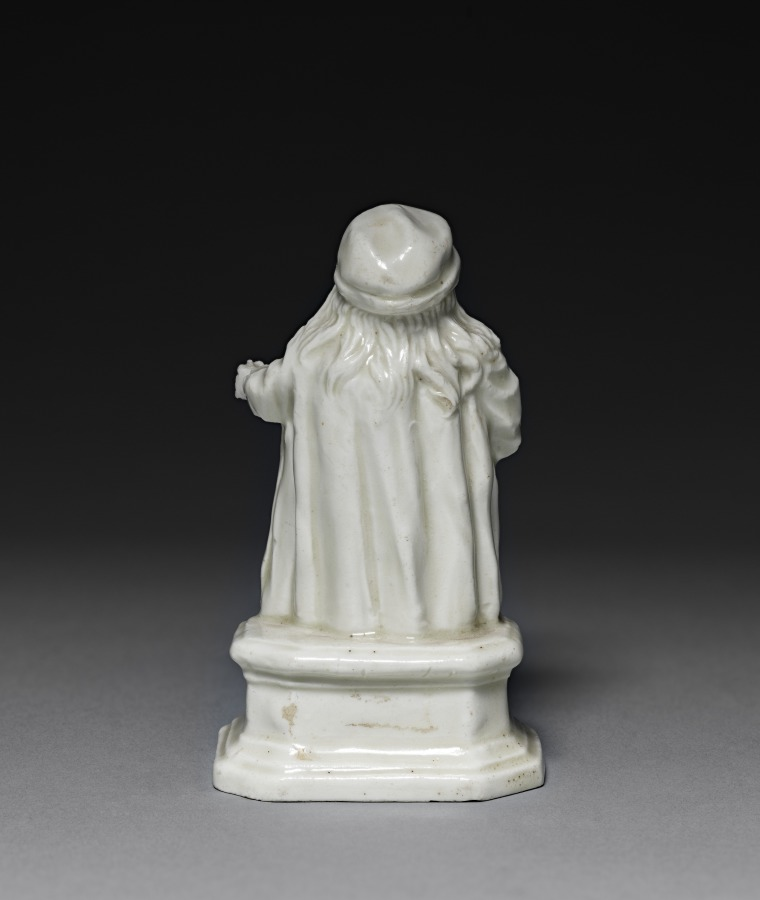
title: Callot Figure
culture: Germany, Meissen, 18th century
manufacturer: Meissen Porcelain Factory (German, est. c. 1710)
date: c. 1720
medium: porcelain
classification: Ceramic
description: This small figure is made of the slightly yellowish porcelain developed by Böttger and used by the Meissen factory during the first decade of its existence. It is one of a series of small figures adapted from engravings in the style of Callot and is thought to have been modeled by Georg Fritzche, who had been employed at Meissen since 1712.